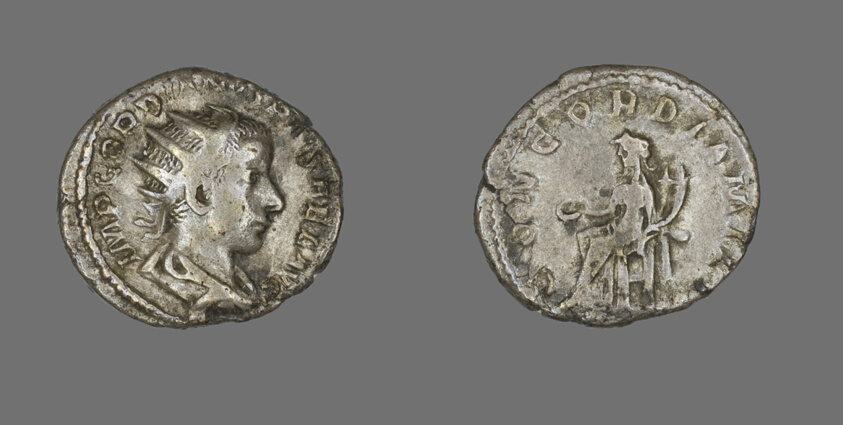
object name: Coin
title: Antoninianus (Coin) Portraying Emperor Gordian III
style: roman (ancient, style or period)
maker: Roman, minted in Rome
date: 240-241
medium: Silver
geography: Roman Empire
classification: coin; ancient art